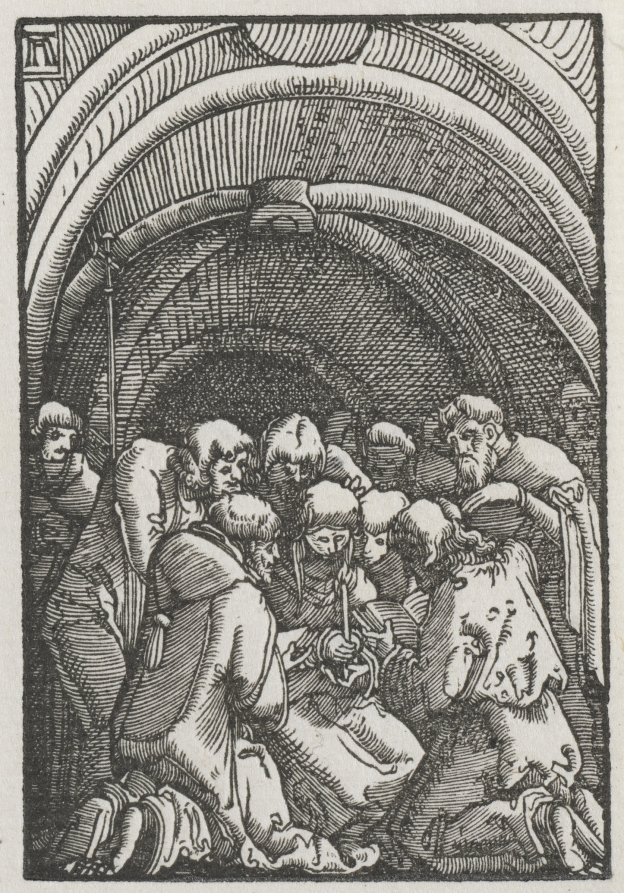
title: The Fall and Redemption of Man: The Death of the Virgin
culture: Germany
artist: Albrecht Altdorfer (German, c. 1480–1538)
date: c. 1515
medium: woodcut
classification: Print